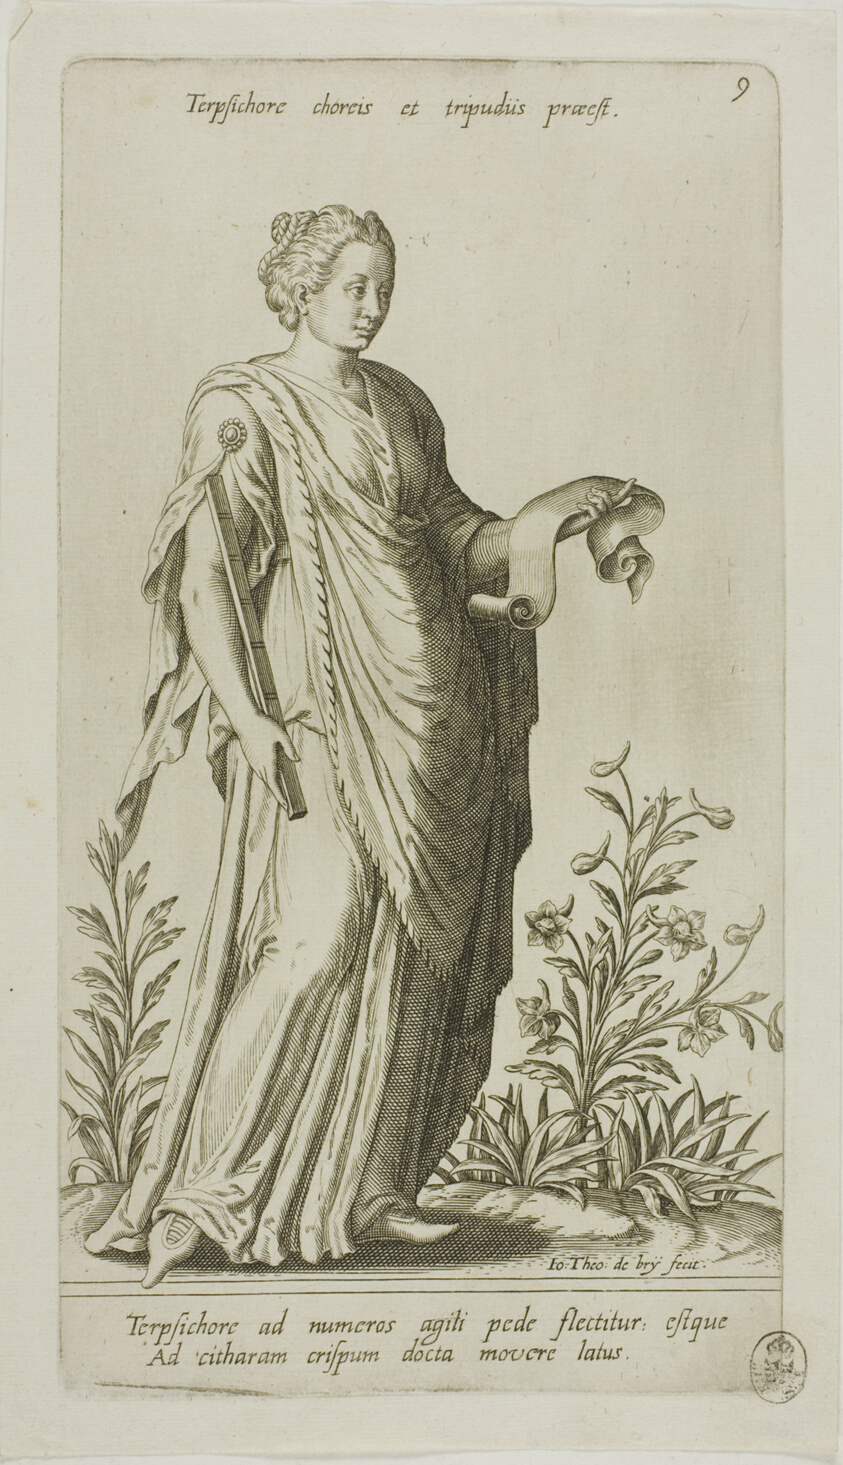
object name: Print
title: Terpsichore, Muse of Dance, plate 9 from Parnassus Biceps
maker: Johann Theodor de Bry (German, 1561-1623); after Jean-Jacques Boissard (French, 1533-1598)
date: 1601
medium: Engraving in black on ivory laid paper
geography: Frankfurt an der Oder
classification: engraving; print; prints and drawing